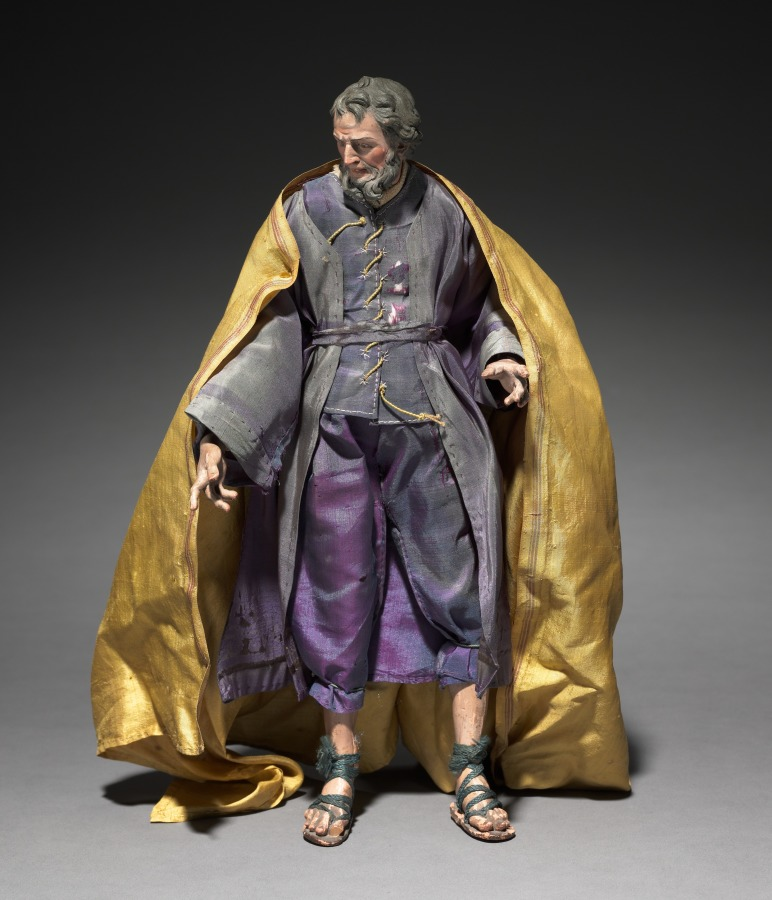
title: Figure from a Crèche: Joseph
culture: Italy, Naples, late 18th-early 19th century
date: 1780–1830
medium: painted wood and terracotta with various textiles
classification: Sculpture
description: The practice of creating scenes of the Nativity for the home dates from the early 1700s in Italy, where people began to set up doll-like figures of about a foot or less in height. The custom was particularly popular in Naples around 1800, where crèche scenes (crèche means cradle, or crib) included many figures, whose heads and hands of painted terracotta, stuffed cloth bodies, and clothing adapted from contemporary local costumes gave them an amazingly realistic character. Representations of the birth of Jesus can be traced to the first few centuries of Christianity. Both living creatures and sculptural depictions of them were used from early times. By the late middle ages it was customary to create life-size figures of wood or stone, naturalistically painted, to represent the characters who participated in the events of Jesus's early life. These sculptures were then arranged in scenes illustrating one or both of the most important of these events, the Adoration of the Shepherds and the Adoration of the Magi-the three kings from the East who came to pay homage to the Christ child. Used in churches, these large figures were especially popular in Italy, Central Europe, Spain, and Portugal.